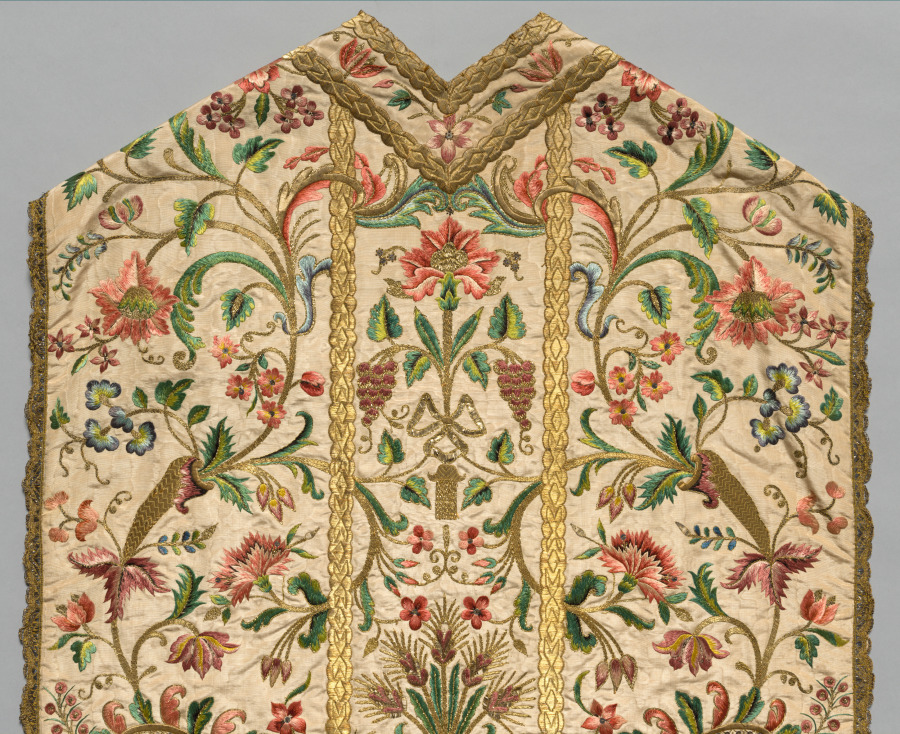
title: Chasuble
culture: Italy, 18th century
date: 1700s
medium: Silk and metallic threads; embroidery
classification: Textile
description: A beautiful design emanates from a vase in the center of this chasuble, displaying symmetrical flora that extend across embroidered gold braids into graceful curvilinear cartouches, reflecting contemporary architectural decoration. Also in the center, sheaves of wheat and grapes represent the bread and wine of the Mass. Gold sequins within thread-outlined squares illustrate fine quality workmanship. The decoration of the stole and chalice veil is similar to the chasuble, also on moiré (watered) silk fabric. The stole, an insignia of the office of deacons and priests, is worn under a chasuble, and the chalice veil—bearing the monogram of Jesus Christ, ihs, in the center—covers the chalice and paten (the plate holding the Eucharistic bread).